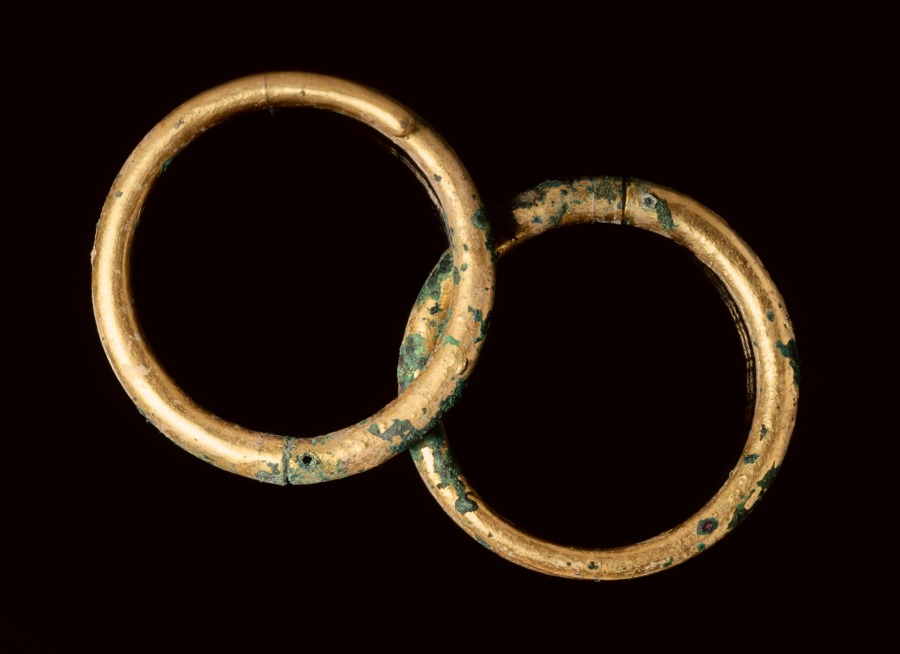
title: Pair of Bangles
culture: India, Shunga period (185–78 BCE)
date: 185–72 BCE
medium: gilt bronze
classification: Jewelry